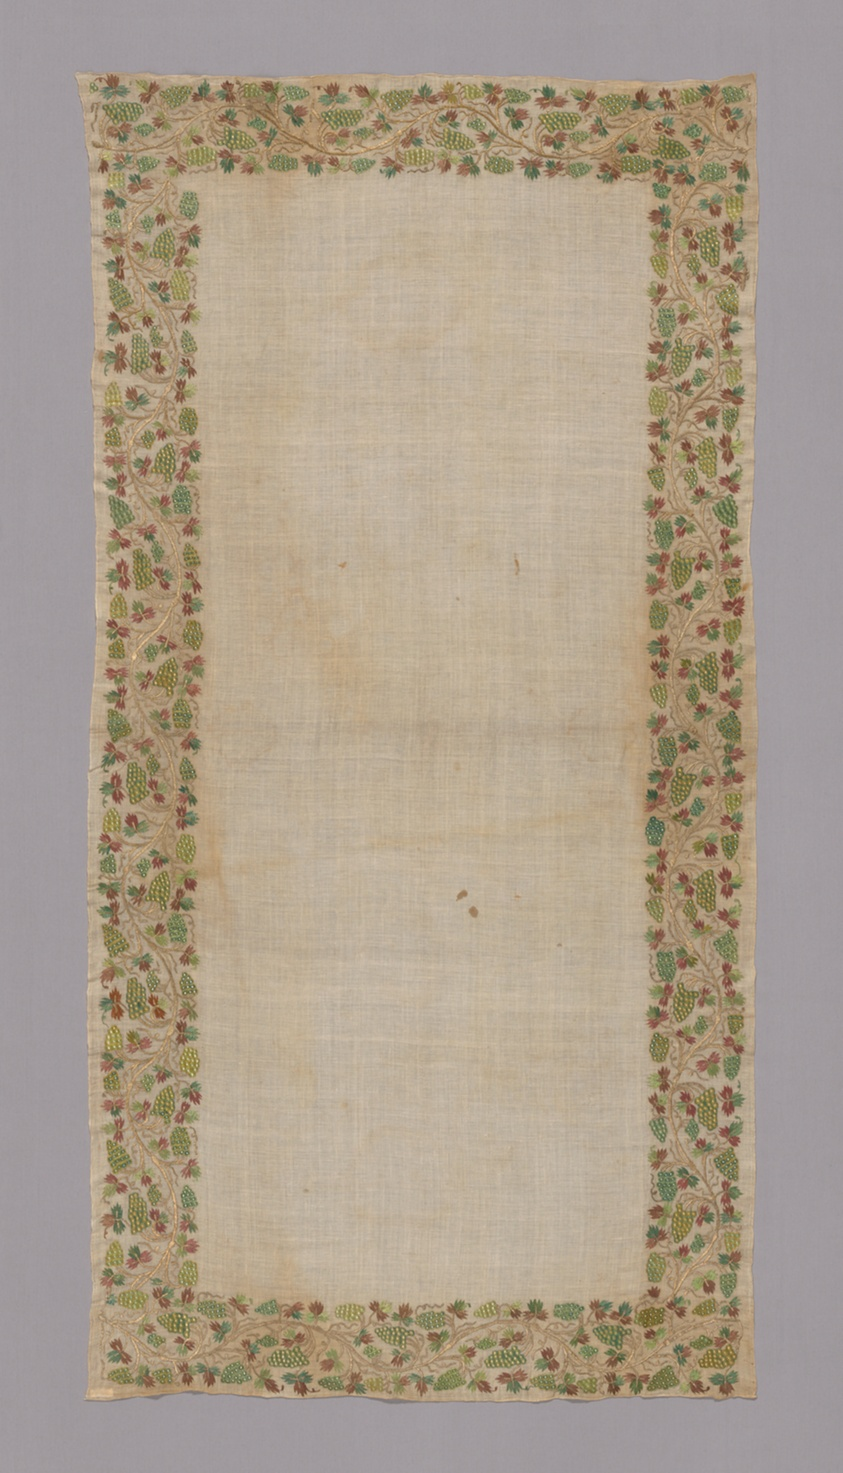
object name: Textile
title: Cover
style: turkish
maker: Turkey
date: 19th century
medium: silk, plain weave; embroidered with silk floss and gilt-metal-strip-wrapped silk in stem, double running, and satin stitches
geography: Turkey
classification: textile; needlework (visual works)